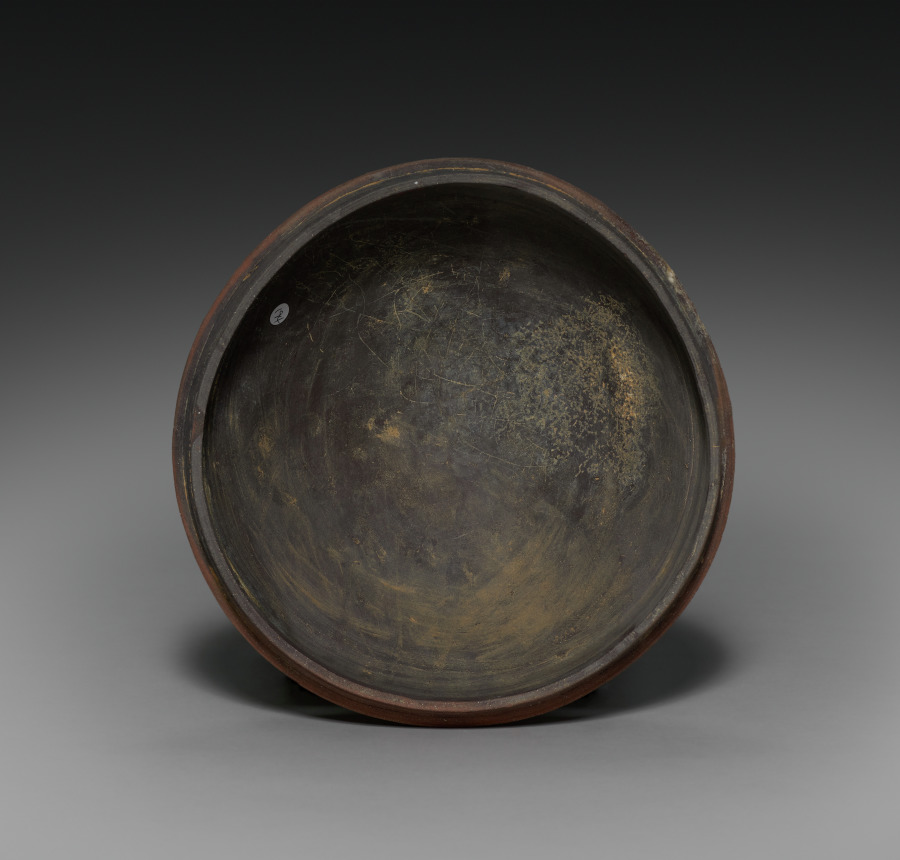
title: Vessel with Knobbed Lid (lid)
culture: Korea, Gaya period (42–562 CE)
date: 200s–300s CE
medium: stoneware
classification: Ceramic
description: This storage vessel is distinguished by its robust, subtly proportioned form and its body color. The purplish-brown surface "skin" is enlivened by a series of smoky black swirling marks that occurred during the firing in the wood kiln. This shape began as a series of clay coils that were pinched and then paddled; however, it spent more time on a potter's wheel to thin and finish its outer surface. The lid received similar, understated attention to detailing and finish.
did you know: This type of lidded vessel served to contain cremated remains, indicating the popularity of Buddhist mortuary practice in Korea during the Three Kingdoms period.